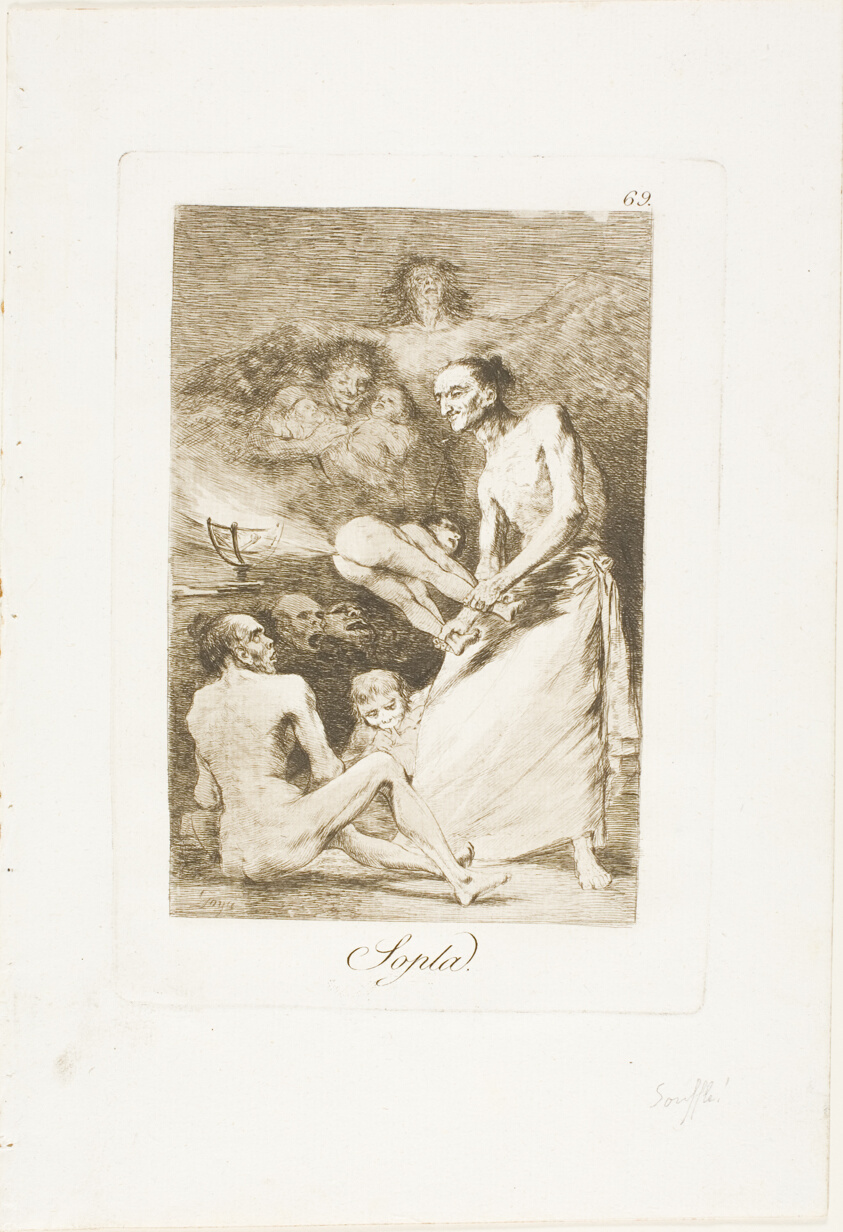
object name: Print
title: Blow, plate 69 from Los Caprichos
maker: Francisco José de Goya y Lucientes (Spanish, 1746-1828)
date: 1797/99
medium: Etching and aquatint on ivory laid paper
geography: Spain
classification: etching; print; prints and drawing